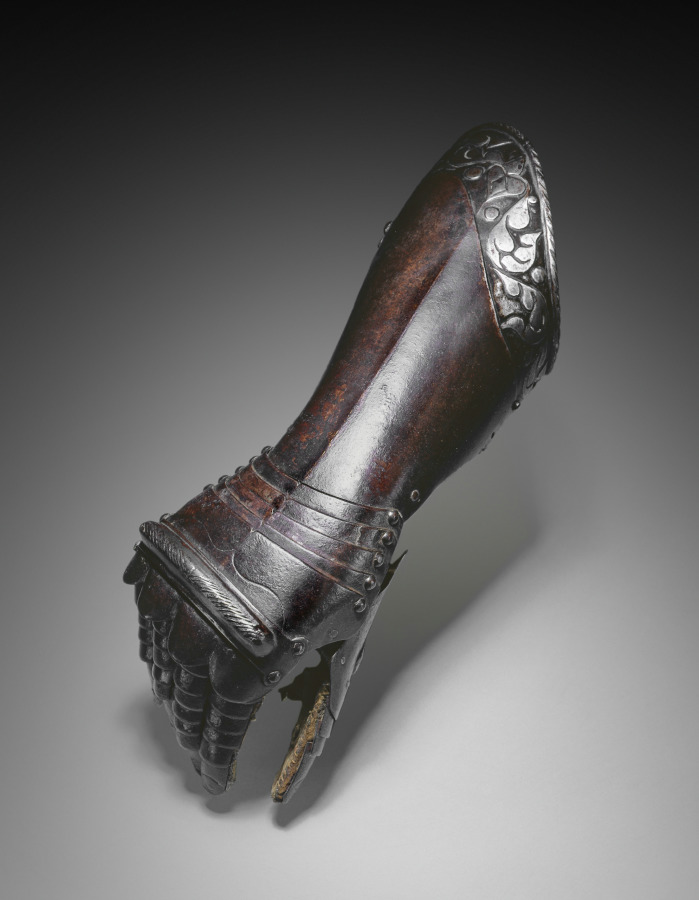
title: Black and White Elbow Gauntlet for the Right Hand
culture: North Germany, 16th century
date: c.1570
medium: steel, blackened with leather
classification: Arms and Armor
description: Plate armor alternately decorated with brightly polished ("white") and darkened ("black") surface areas is commonly referred to as "black and white" armor. The black color results from painting the surface areas, or merely leaving them dark from the forging process. The gauntlet here has been further embellished with an embossed cuff. The 1500s saw the revival of this ancient technique also known as repoussé. First the pattern is drawn onto the surface and then hammered and punched from the inside to gradually shape the desired raised design on the outer surface of the metal. This technique was reserved for only the costliest of armors.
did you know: To throw a gauntlet or armored glove at the feet of your enemy or opponent was a grave insult, one only to be matched with personal combat. This is where we get the modern phrase "throw down the gauntlet."